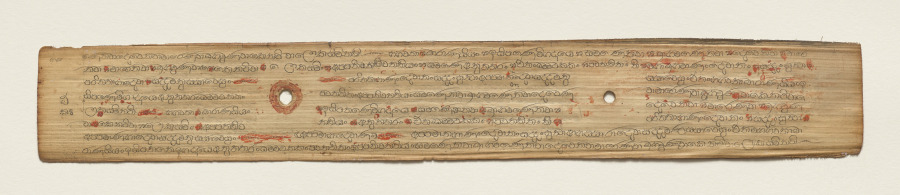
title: Leaf from a Buddhist Manuscript (recto)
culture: Sri Lanka, Singhalese, Late 17th century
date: c. 1700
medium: fiber paper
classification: Manuscript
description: Palm leaf material is still used for manuscripts in Sri Lanka. The palm leaves are prepared first by boiling them, drying them in the sun, and then rubbing them with oils. Scribes then use a metal stylus to incise the text. Then charcoal powder is wiped across the pages, filling in only the inscribed lines.